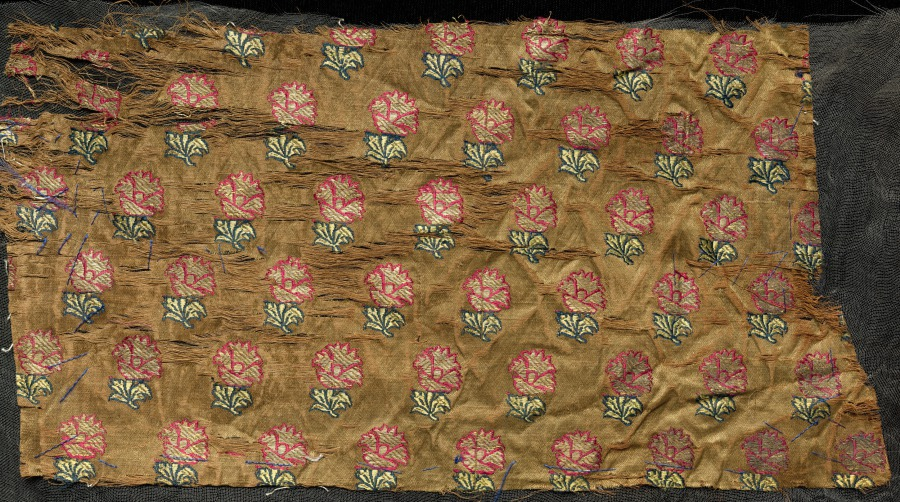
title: Book Cover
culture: India, 19th century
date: 1800s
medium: brocade, "kimkhwab"; silk, cotton, gold thread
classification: Textile